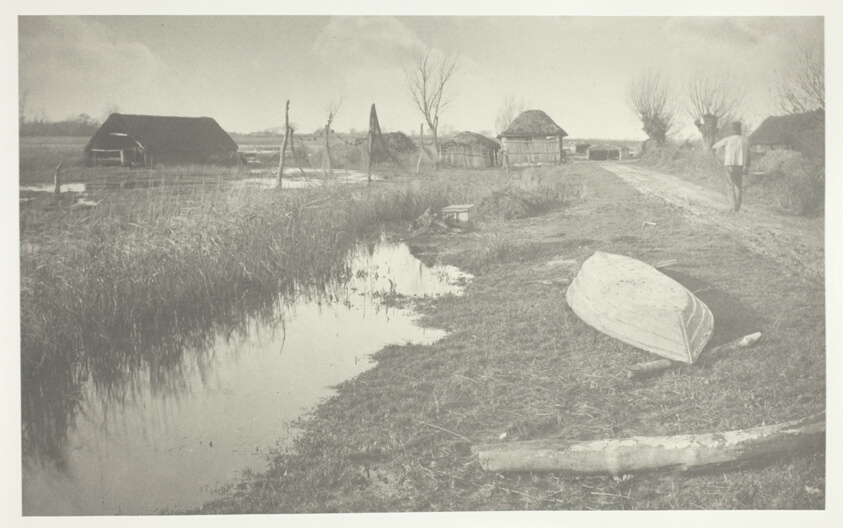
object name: Photograph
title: 'Twixt Land and Water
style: 19th century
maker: Peter Henry Emerson (English, born Cuba, 1856–1936)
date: 1886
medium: Platinum print, pl. XXXVI from the album "Life and Landscape on the Norfolk Broads" (1886)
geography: England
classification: platinum print; photographic process; photography; photograph